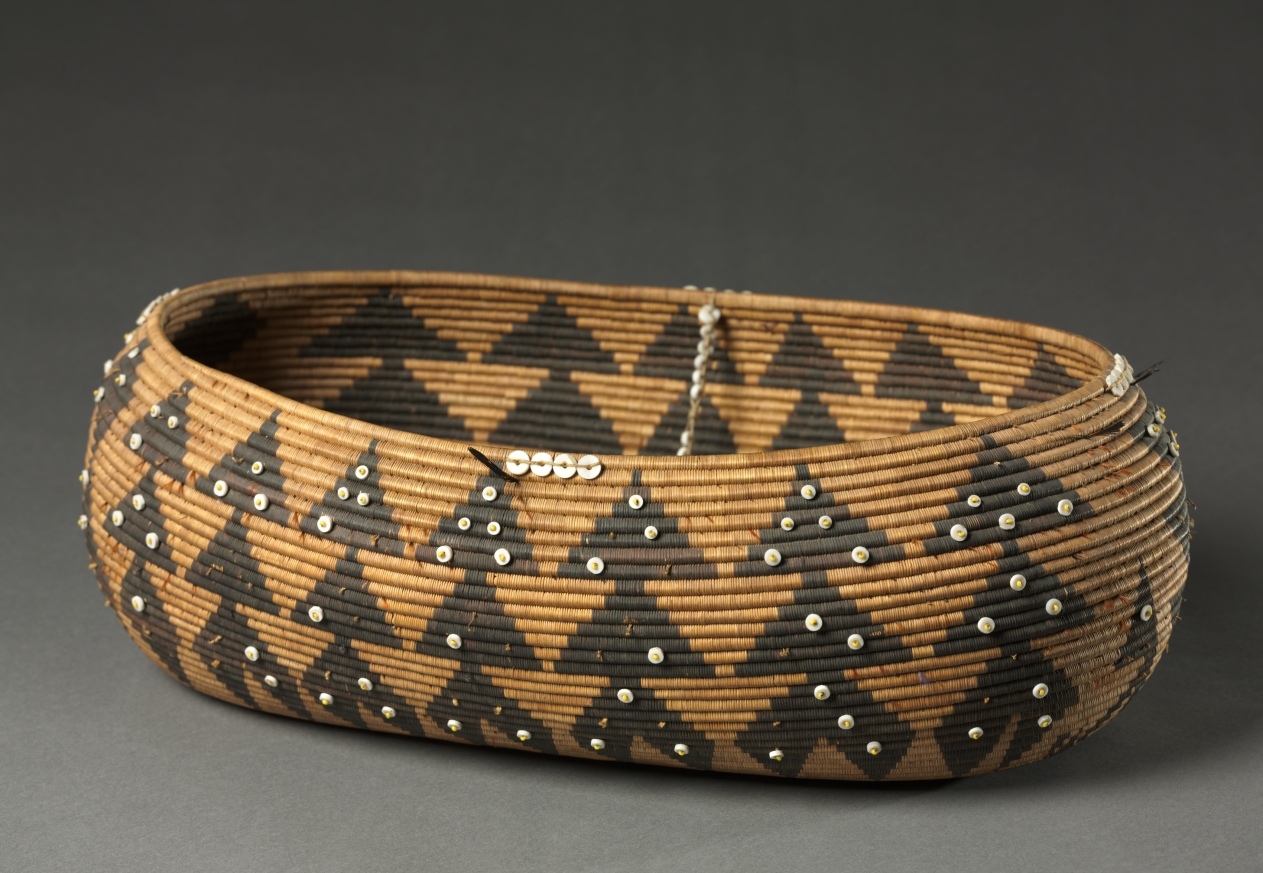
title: Doctor's Basket, Canoe- shaped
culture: California, Pomo, 19th century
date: 1890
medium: coiled, with shell and yellow glass beads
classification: Basketry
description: Oblong baskets like this one, which range in size from miniatures to examples more than four feet long, are sometimes said to have been used by native doctors to store medicines and paraphernalia such as rattles. This one, however, probably was made not for native use but for sale to a turn-of-the-century collector.